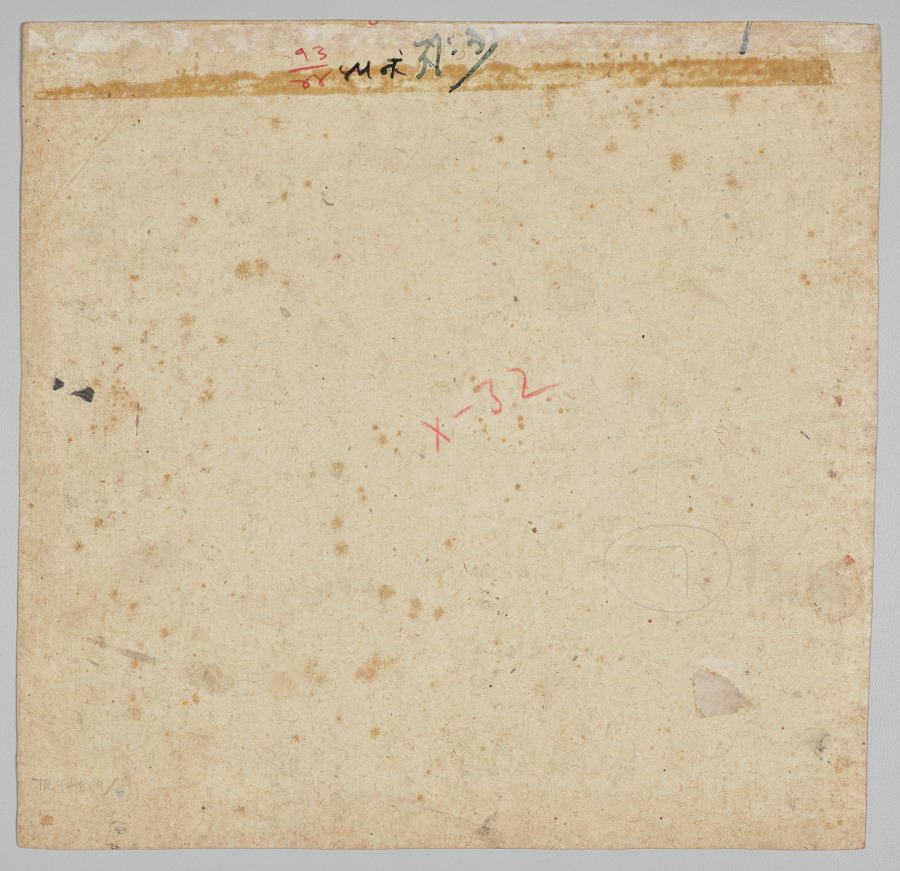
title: Royal Elephant Ramkali with a Mahout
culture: Northwestern India, Rajasthan, Rajput kingdom of Mewar, Udaipur, Court of Ari Singh (reigned 1761-73)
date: c. 1761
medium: gum tempera, ink, and gold on paper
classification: Painting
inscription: hathaṇī rāmkalī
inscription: mahārāṇaji śrī rāj (?) singh ri biraṇi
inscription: 13/44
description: The mahout (elephant driver), directs the confident female elephant at a brisk trot, with bells swinging in response to her movements. This painting belongs to a series depicting the elephants in the royal stables at Udaipur, each one named in the upper margin. Elephants have been a potent emblem for royalty in India for more than three thousand years.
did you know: The name Ramkali is a popular nickname for young girls in some parts of northern India.